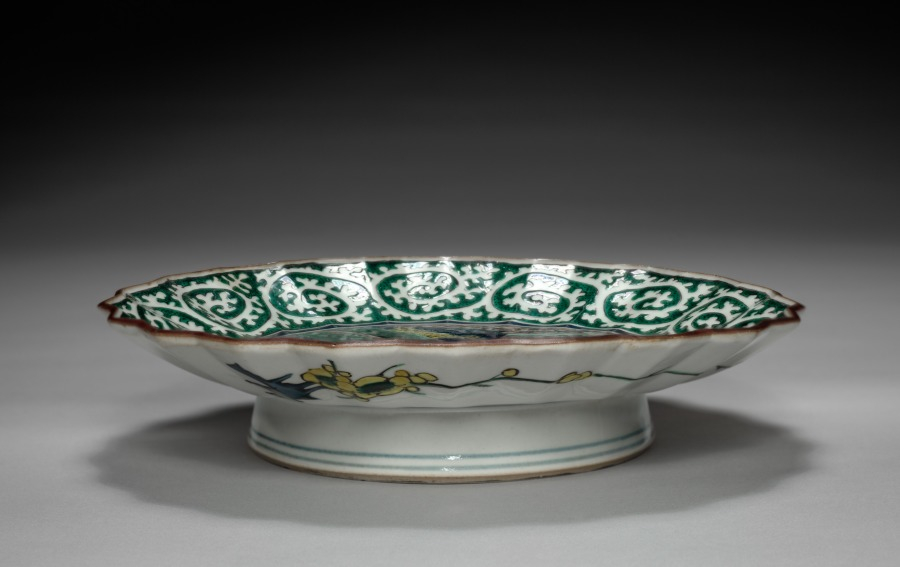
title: Foliate Dish with Banana Leaf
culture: Japan, Edo period (1615–1868)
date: mid-1800s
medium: porcelain with overglaze enamel decoration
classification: Ceramic